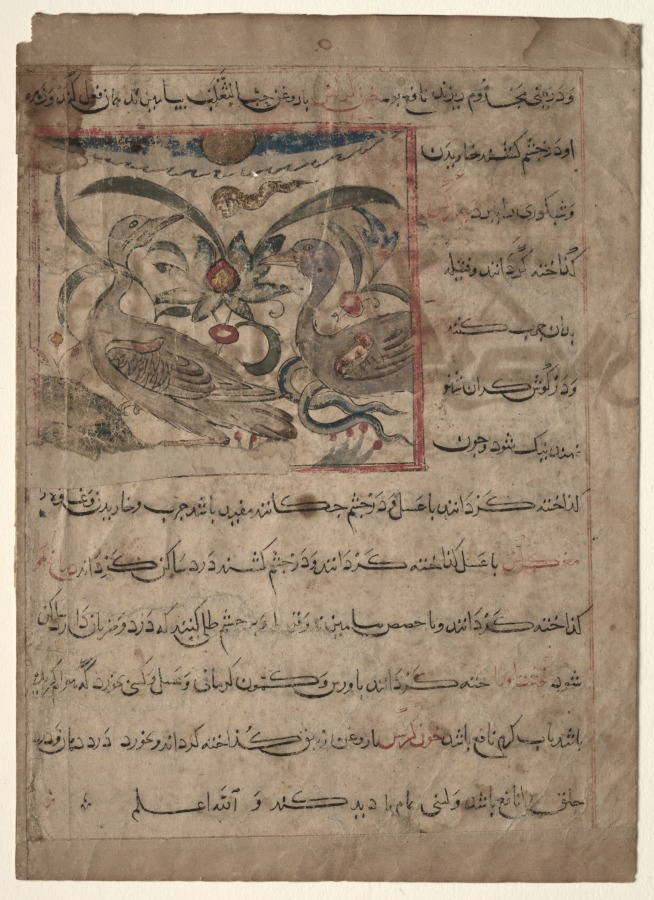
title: "Benefits of the Parts of Vultures" (From the Manafi' al-Haywan of Abu Sai'd Ubayd-Allay Ibn Bakhtishu)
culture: Iran, Marageh, Mongol Period (Ilkhanid), late 13th Century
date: late 1200s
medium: opaque watercolor, ink and gold on paper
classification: Manuscript